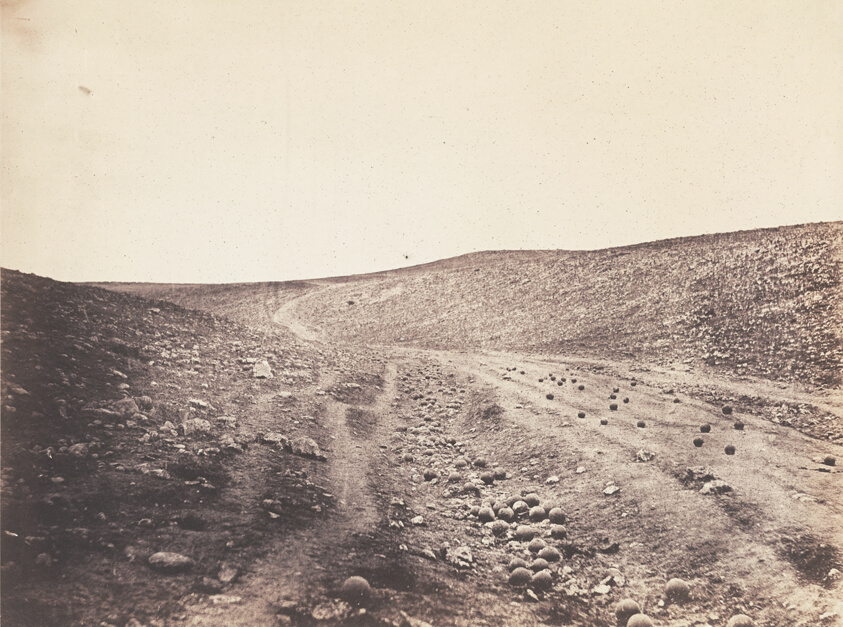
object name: Photograph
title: The Valley of the Shadow of Death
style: 19th century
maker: Roger Fenton (English, 1819–1869)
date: 1855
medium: Salted paper print, from the album "Photographic Pictures of the Seat of War in the Crimea" (1856)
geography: England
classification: salted paper print; photographic process; photography; photograph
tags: Collected by Hugh Edwards, documentary